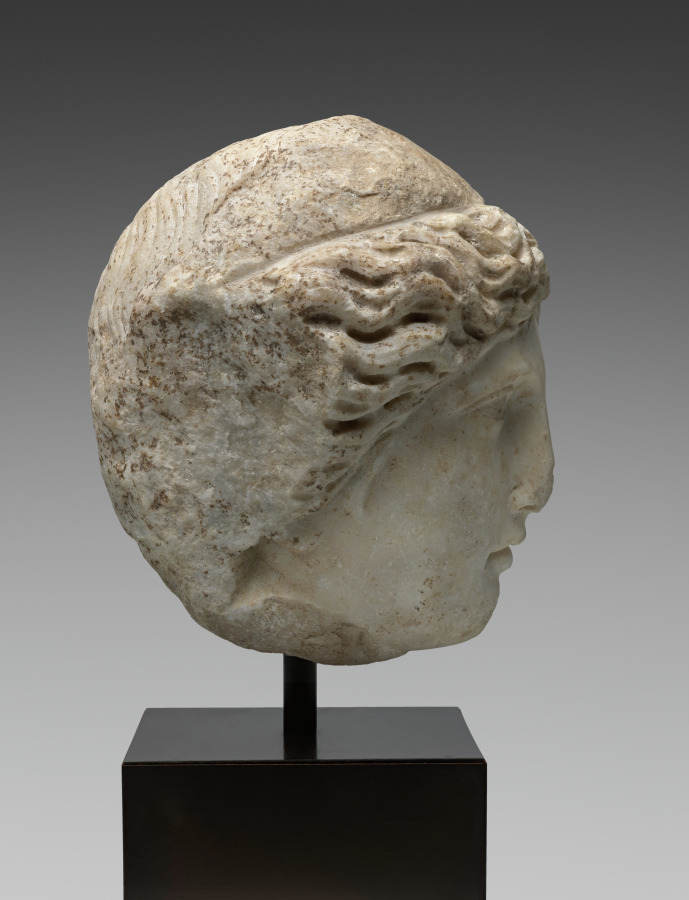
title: Head of Apollo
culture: Roman, Imperial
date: 1–200 CE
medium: marble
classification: Sculpture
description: This marble head, about three-quarter life-sized with idealized features, likely represents Apollo, the god most renowned for his youthful beauty. The hair spreads from a central part, flowing to either side in long and deeply drilled locks that cover the ears. An incised line separates these locks from a rougher area above, probably reserved for a separately made diadem or wreath, likely of metal.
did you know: This head of Apollo has also been identified as female, perhaps a Muse or other goddess.